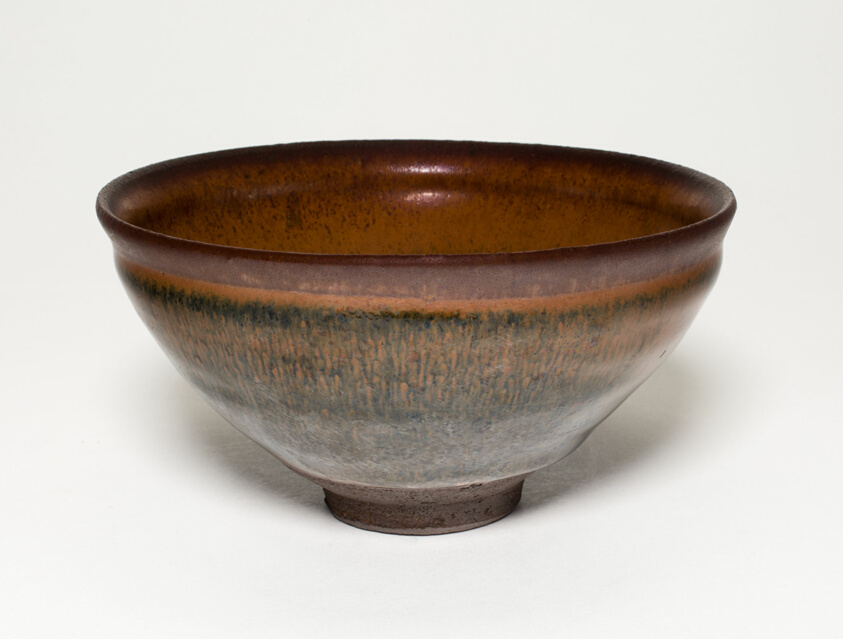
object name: Vessel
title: Tea Bowl with "Hare's fur" Glaze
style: Chinese (culture or style), song, East Asian, asian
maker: China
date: Song dynasty (960–1279)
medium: Stoneware with dark brown "hare's fur" glaze and molded applied decoration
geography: China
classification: drinking vessel; stoneware; ceramics; asian art; vessel